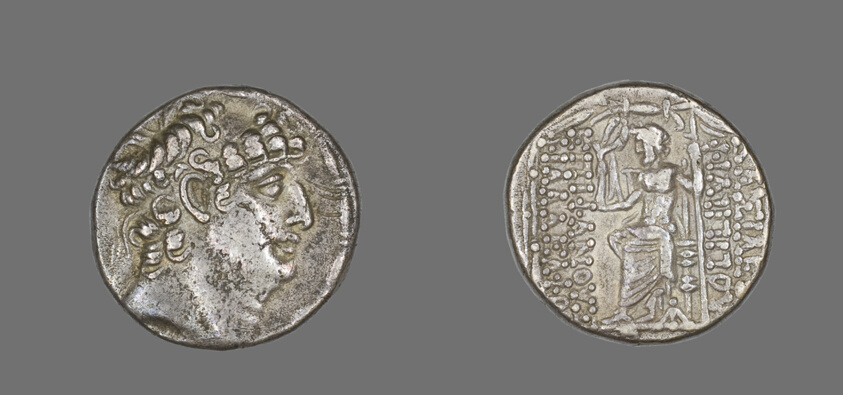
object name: Coin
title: Tetradrachm (Coin) Portraying Philip Philadelphus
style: greek, ancient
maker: Greek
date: 92-83 BCE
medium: Silver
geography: Macedonia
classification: coin; ancient art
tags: mythological figures, zeus